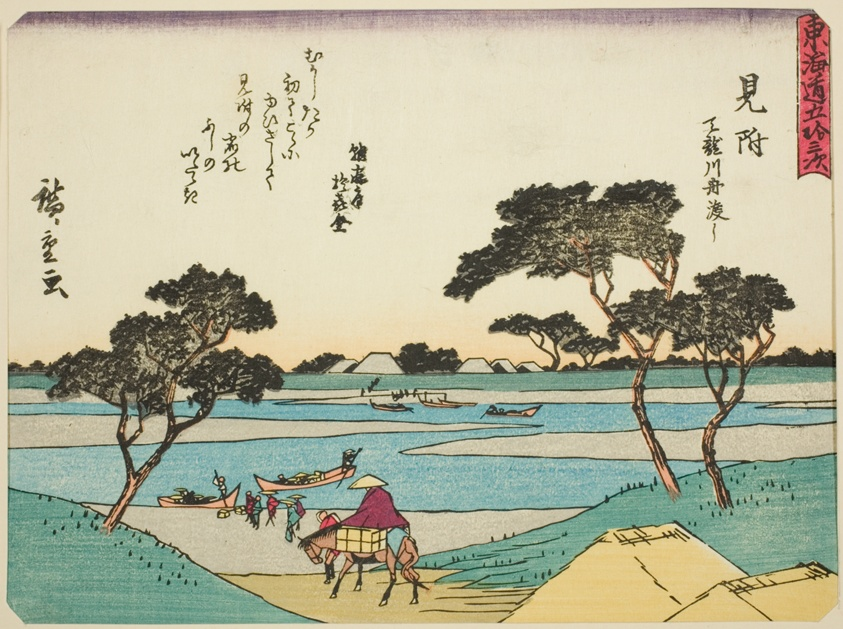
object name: Print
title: Mitsuke: Ferries Crossing the Tenryu River (Mitsuke, Tenryugawa funawatashi), from the series "Fifty-three Stations of the Tokaido (Tokaido gojusan tsugi)," also known as the Tokaido with Poem (Kyoka iri Tokaido)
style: Japanese (culture or style)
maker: Utagawa Hiroshige 歌川 広重; Japanese, 1797-1858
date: c. 1837/42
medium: Color woodblock print; chuban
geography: Japan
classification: woodblock print; print; asian art